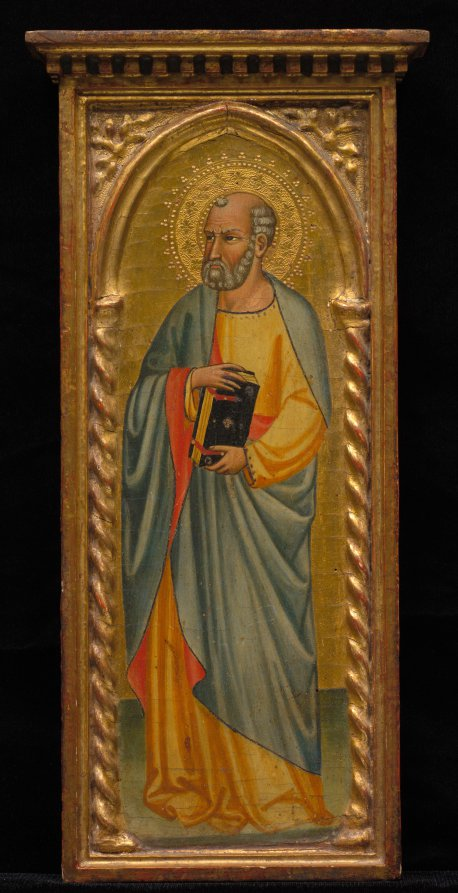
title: Standing Saint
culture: Italy, late 19th-early 20th century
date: late 19th - early 20th century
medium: tempera on panel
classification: Painting